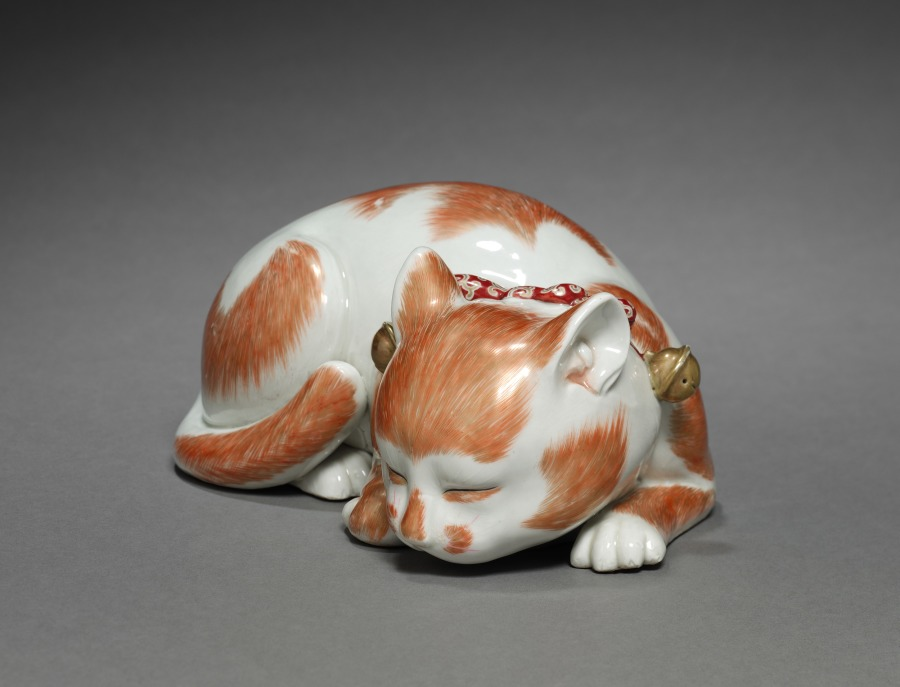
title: Sleeping Cat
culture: Japan, Edo period (1615–1868)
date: early to mid-1800s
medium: Porcelain with overglaze color enamel and gold (Hizen ware)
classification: Sculpture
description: Models of sleeping cats with collars and bells like this one were popular as decorative objects, and some of them also served as incense burners or hand warmers. This cat was just for display and has very carefully incised lines in the surface of the clay body, as well as thin strokes of orange and gold over the glaze to create the sense of soft fur.